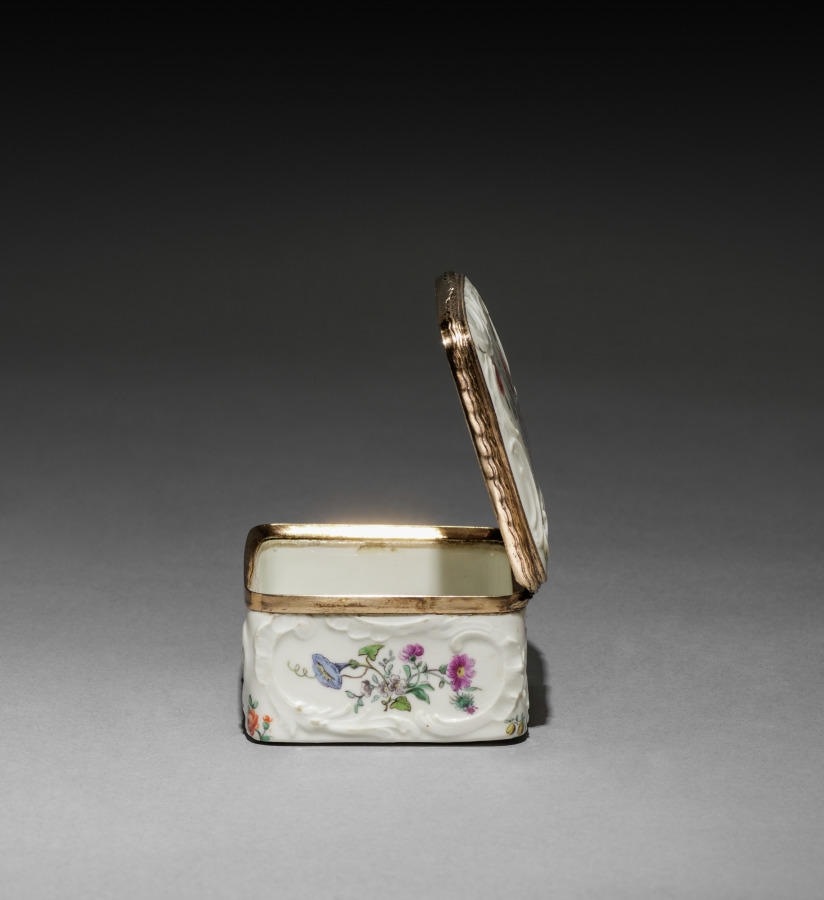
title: Box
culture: South Germany, 18th century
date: 1750–1775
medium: porcelain with silver-gilt mounts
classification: Miscellaneous